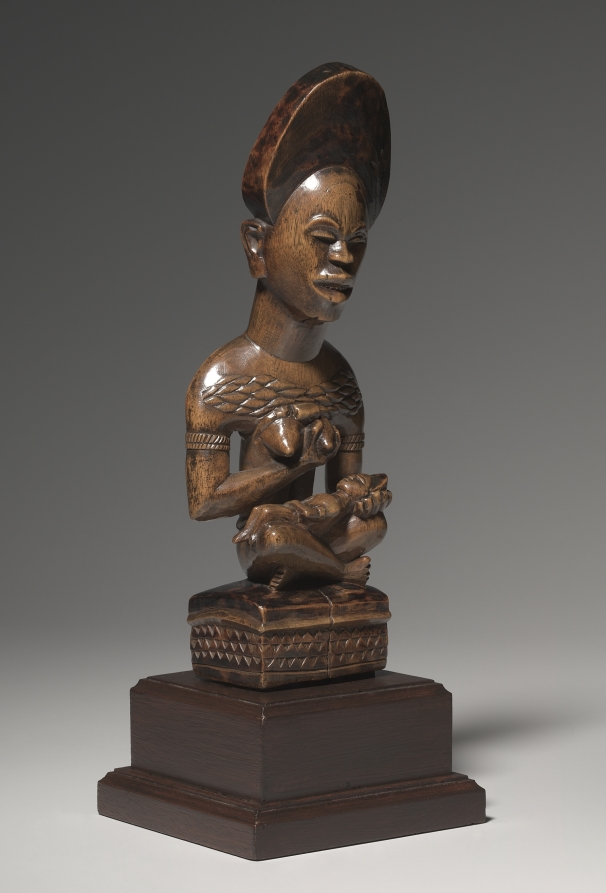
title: Woman and Child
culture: Africa, Central Africa, Democratic Republic of Congo, Yombe-style carver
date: mid- to late 1800s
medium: Wood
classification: Sculpture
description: This mother-and-child figure was probably part of a cult concerned with the treatment of infertility. Both her jewelry and her seated pose indicate that the woman occupied a high rank in her community. Her miter-shaped hairstyle, chiseled teeth, and raised body scars--considered to be marks of beauty and perfection--signal that the woman incarnates the founding ancestor of a kinship group.